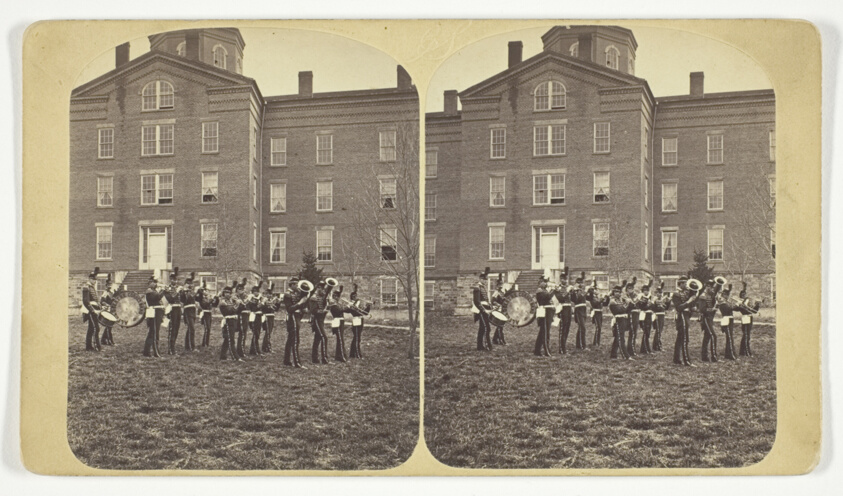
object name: Photograph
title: Untitled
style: 19th century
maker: Irving Saunders (American, active late 19th century)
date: Late 19th century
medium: Albumen print, stereo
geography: New York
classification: photography; photograph; albumen silver print; stereograph (albumen)